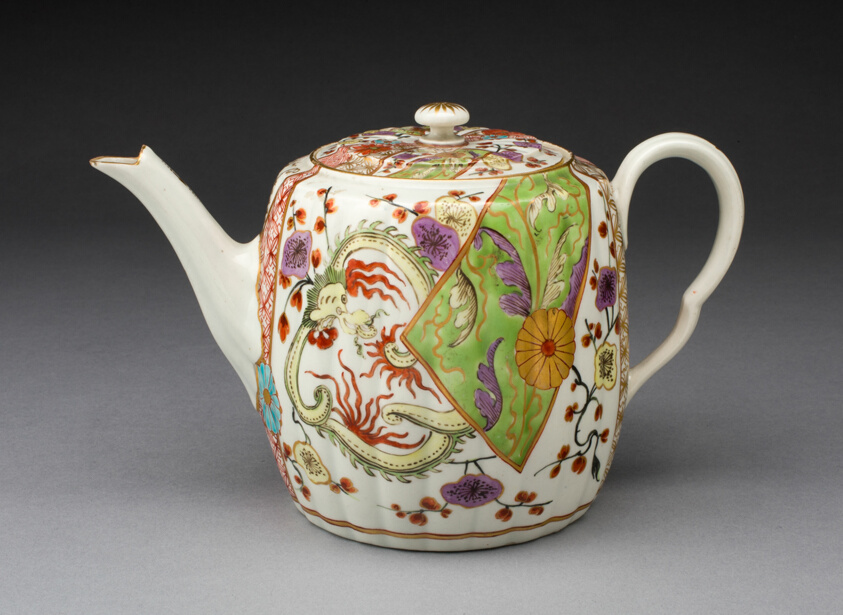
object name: Ceramics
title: Teapot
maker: Worcester Porcelain Factory (Warmstry House Period, 1751–1783); Worcester, England, founded 1751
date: c. 1770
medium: Soft-paste porcelain with polychrome enamels and gilding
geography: Worcester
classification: teapot; teaware; porcelain; european decorative arts; ceramics